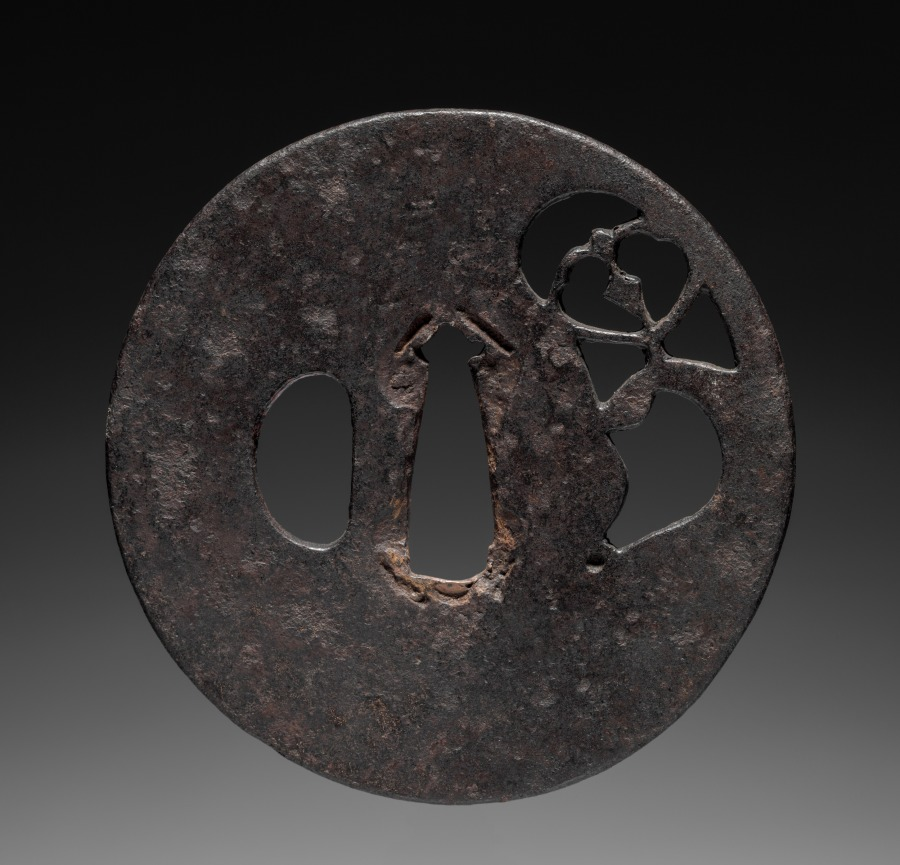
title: Sword Guard (Tsuba)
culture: Japan, possibly Edo period (1615-1868)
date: c. 1615–1868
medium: iron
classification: Arms and Armor